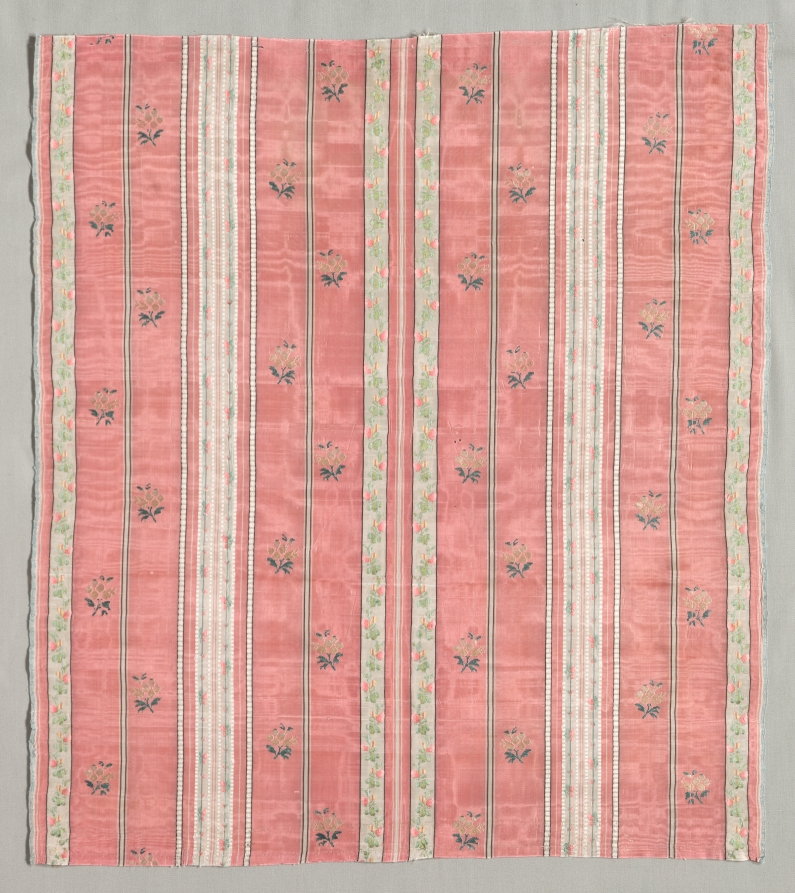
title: Silk Brocaded Textile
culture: France, 18th century, period of Louis XVI (1774-1793)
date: 1774–1793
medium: moiré, brocaded and warp-patterned; silk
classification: Textile